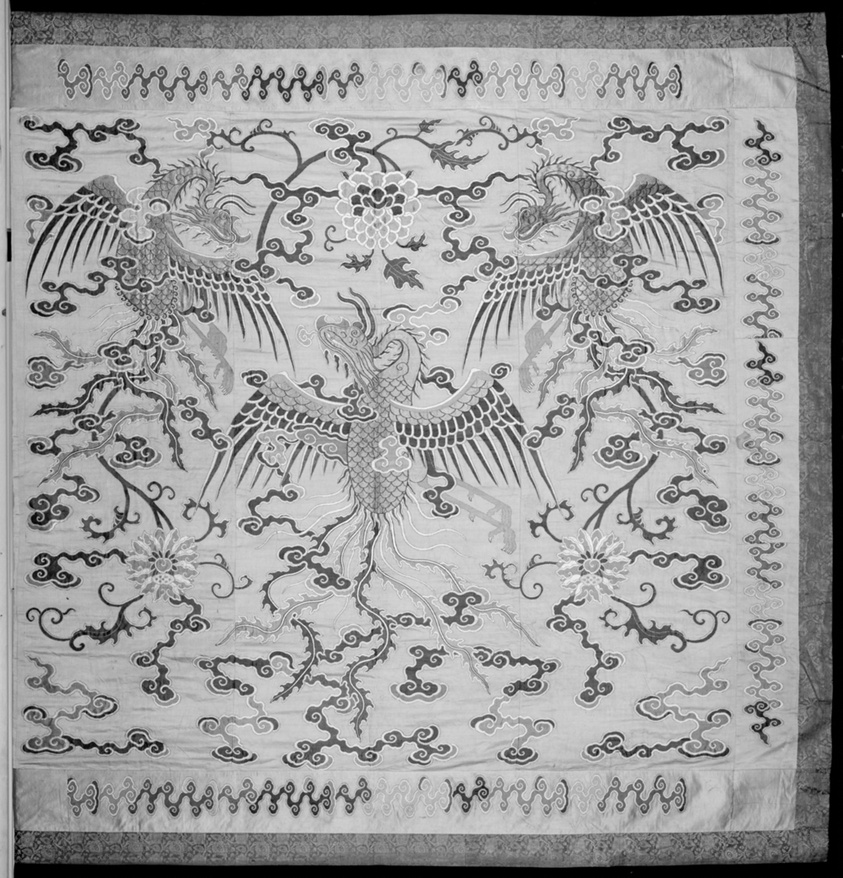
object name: Textile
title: Bed Curtain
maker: Manchu (China)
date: Mid–17th/mid–18th century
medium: center panel and inner borders: silk, gold-leaf-over-lacquered-paper strips, and gold-leaf-over-lacquered-paper-strip-wrapped silk, warp-float faced 7:1 satin weave with supplementary brocading wefts bound in weft-float faced 1:3 'S' twill interlacings; outer border: silk, warp-float faced 5:1 twill weave with weft-float faced 1:2 'Z' twill interlacings of secondary binding warps and supplementary patterning wefts; lined with cotton, plain weave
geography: China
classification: weaving; textile